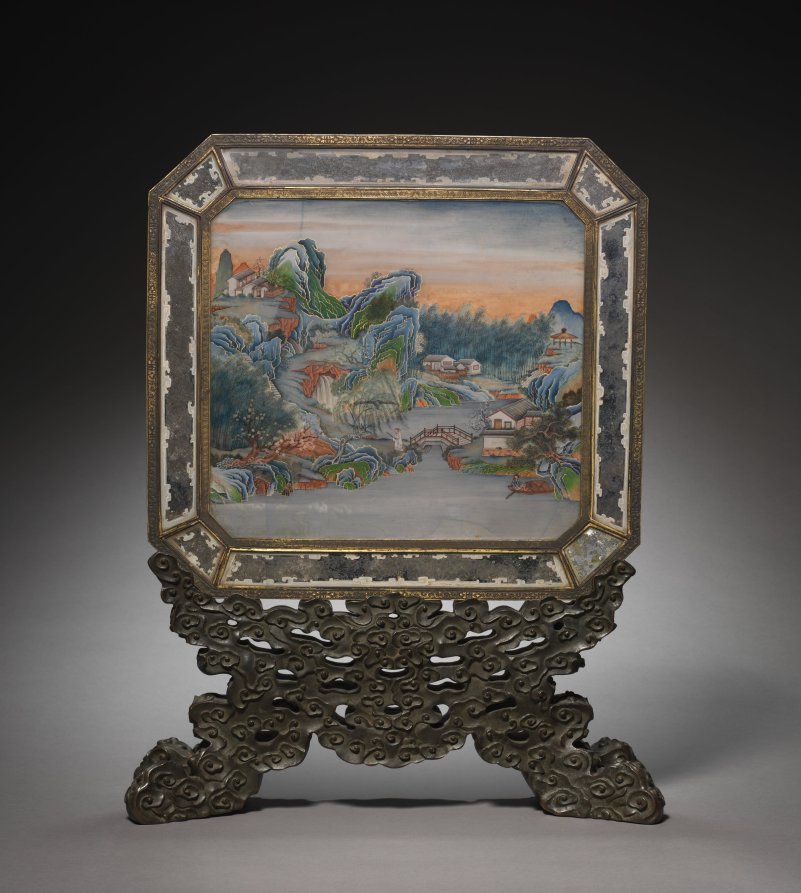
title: Screen with European Figures (obverse) and Landscape (reverse) with Stand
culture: China, Beijing palace workshops, Qing Dynasty (1644-1911), Qianlong reign (1736-1795)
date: 1736–95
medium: painted enamel, glass painting, and cast-iron stand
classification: Enamel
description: On the obverse side of this two-sided table screen is an enamel-painted copper plaque with European figures. The image is probably derived from prints. European enamelware was introduced to China through missionary-artists at the Beijing court and foreign trade in Guangzhou. On the reverse side is a glass painting of architectural landscape in the Chinese style. At the Qing court, imperial commands made possible artistic collaboration and the incorporation of different artistic expressions in a single artwork.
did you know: The screen is balanced on a heavy cast-iron base.